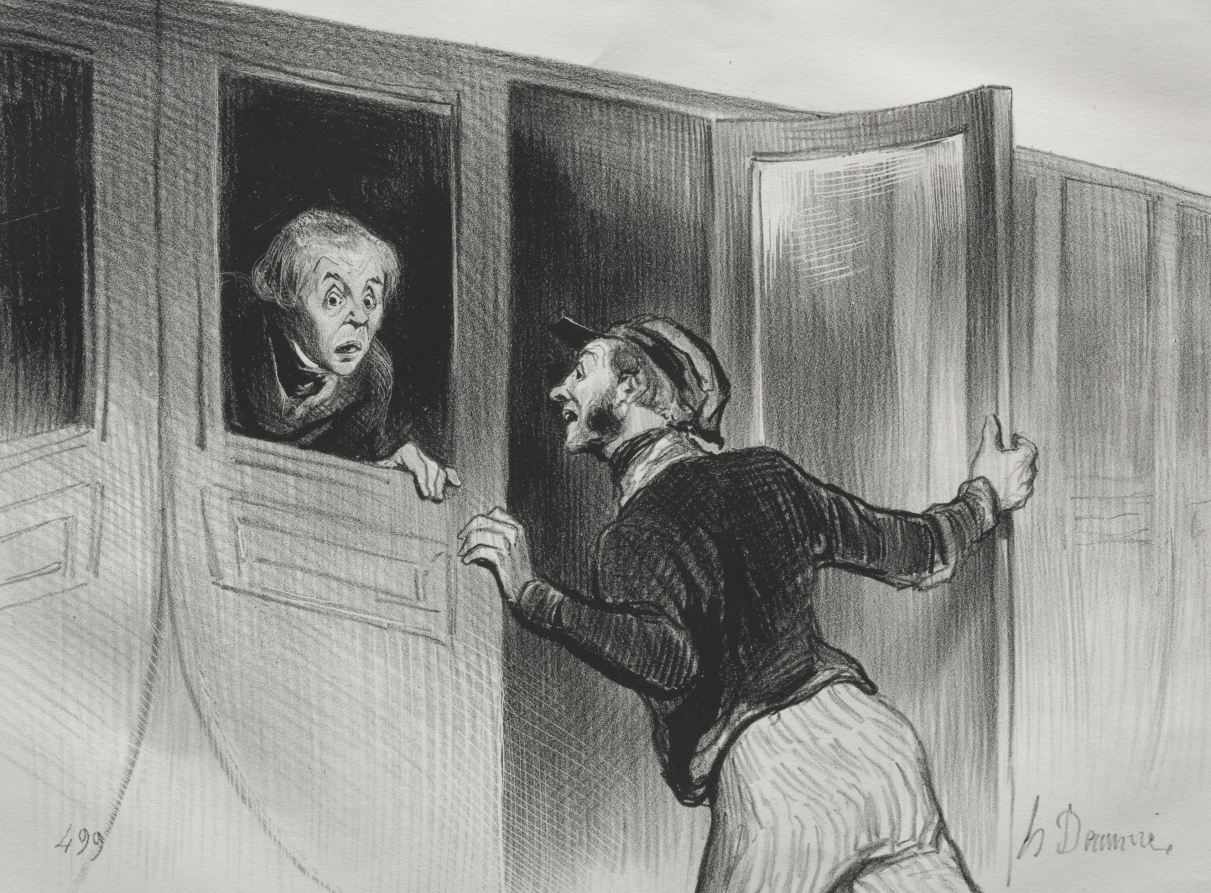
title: The Hazard of Sleeping on a Journey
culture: France, 19th century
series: The Railroads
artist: Honoré Daumier (French, 1808–1879)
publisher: Aubert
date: 1843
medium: lithograph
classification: Print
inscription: Upper margin, in pencil: H&D 1146 / I / R.R.R. ; Lower margin, in pencil: Les chemins de fer N 11 / 11618(?)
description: This print was published in Le Charivari (October 28, 1843) as plate 11 from the series The Railroads.